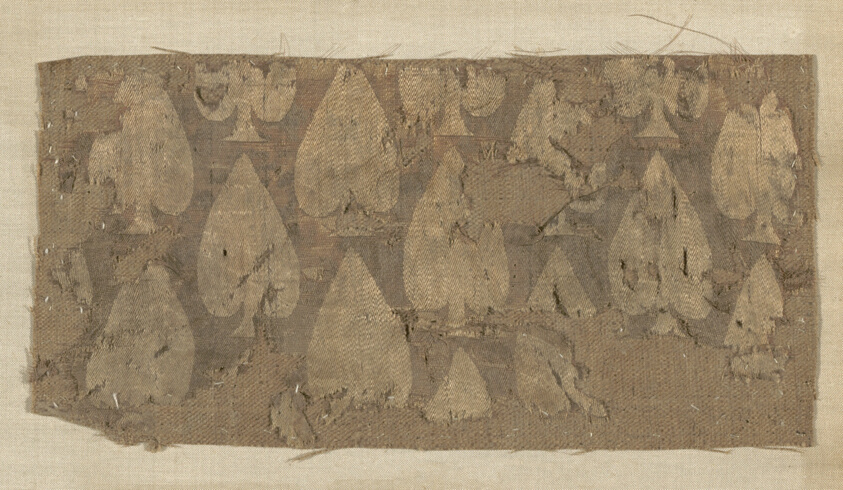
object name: Textile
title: Fragment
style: roman period (egyptian), coptic (period)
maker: Egypt, probably Akhmin; Found in Egyptian tombs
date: Roman period (30 B.C.– 641 A.D.)/Arab period (641–969), 6th/7th century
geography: Egypt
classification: textile; weaving